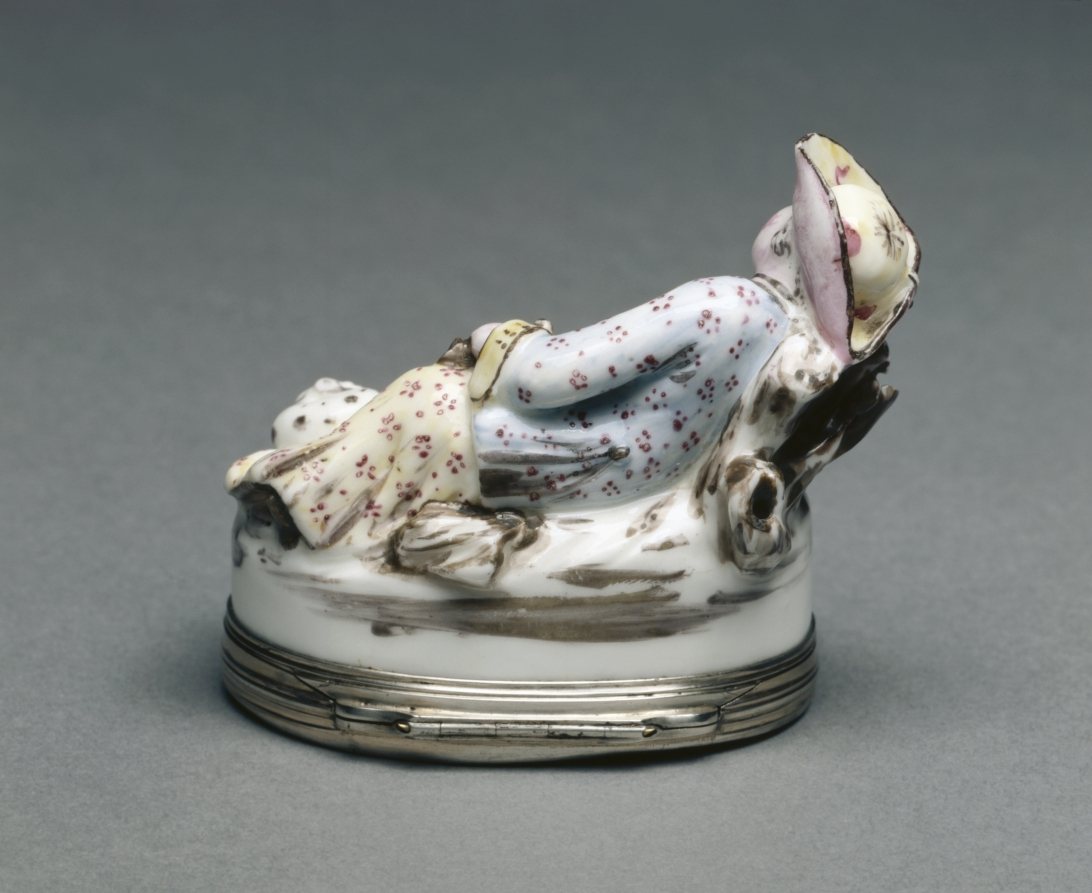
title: Box with Reclining Huntress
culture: France, Mennecy, 18th century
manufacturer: Mennecy Factory (French)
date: c. 1753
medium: soft-paste porcelain mounted in silver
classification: Ceramic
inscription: porcelain unmarked